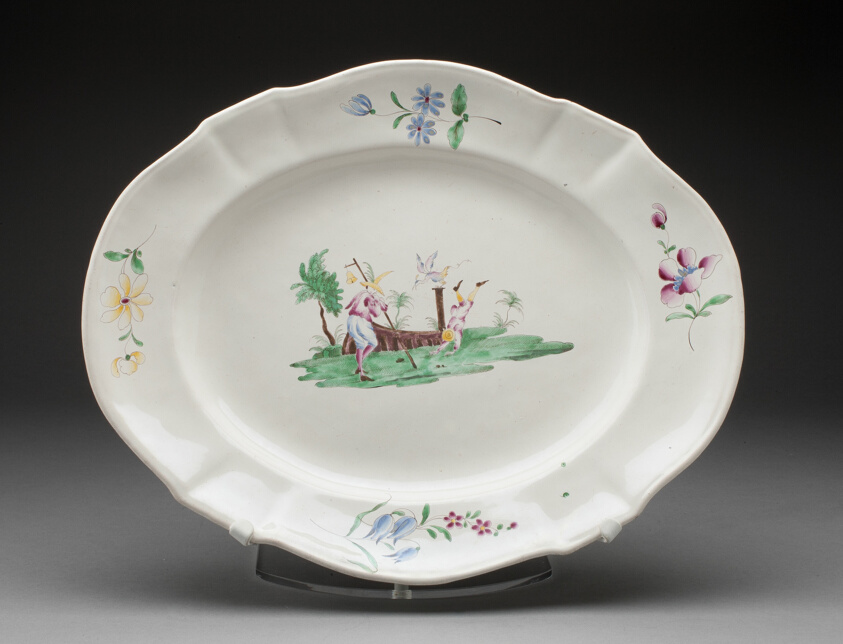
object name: Ceramics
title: Platter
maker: Joseph Hannong Manufactory; French, 1760-1781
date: c. 1770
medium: Tin-glazed earthenware (faience)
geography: Strasbourg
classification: vessel for serving food; dish (vessel); tin-glazed ware; earthenware; european decorative arts; ceramics